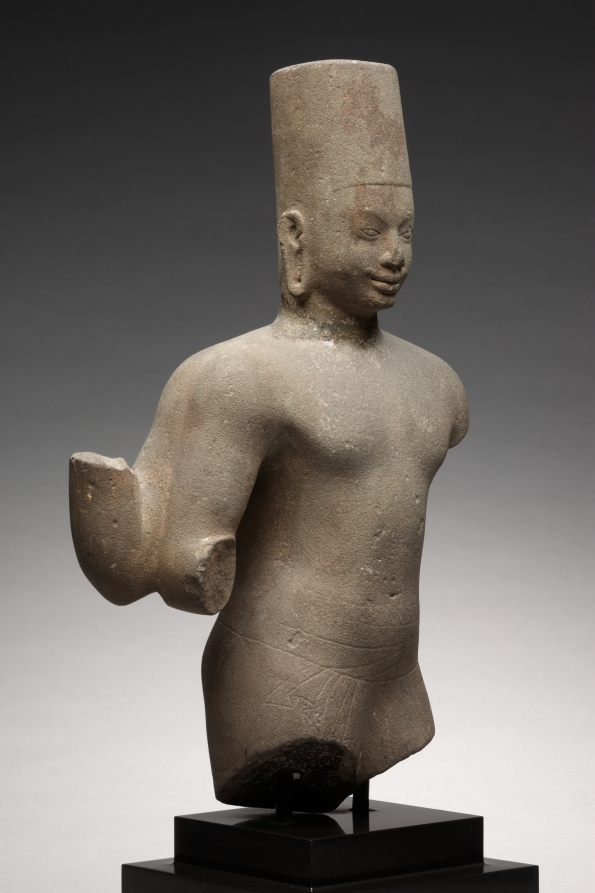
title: Vishnu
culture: Cambodia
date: 650–700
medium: sandstone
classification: Sculpture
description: Vishnu has the features of royalty, indicated by the high mitre-like crown with the flat top, distinctive to types made at the site of Prasat Andet. His status as a god, greater than any earthly king, is indicated by the four arms, traces of which are still visible. The sensitive rendering of the eyes and slight smile are characteristics of Cambodian sculpture, and during this early period, the form of the body reveals some relatively naturalistic musculature and treatment of the garments. He wears the Southeast Asian lower garment called sampot, around which his upper garment is loosely tied. It is Vishnu who incarnates himself into the world in avatars, including Krishna and the boar Varaha. Here we see his iconic form as Vishnu himself.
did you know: The deity is four-armed with the arms running parallel from the shoulders and then bifurcating at the elbows.